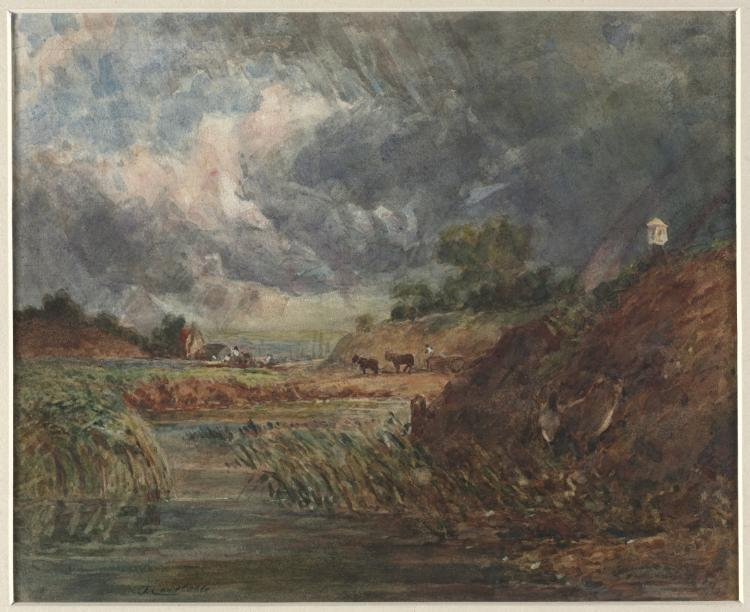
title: Hampstead Heath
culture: England, 19th century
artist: imitator of John Constable (British, 1776–1837)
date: 1800s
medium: watercolor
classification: Drawing